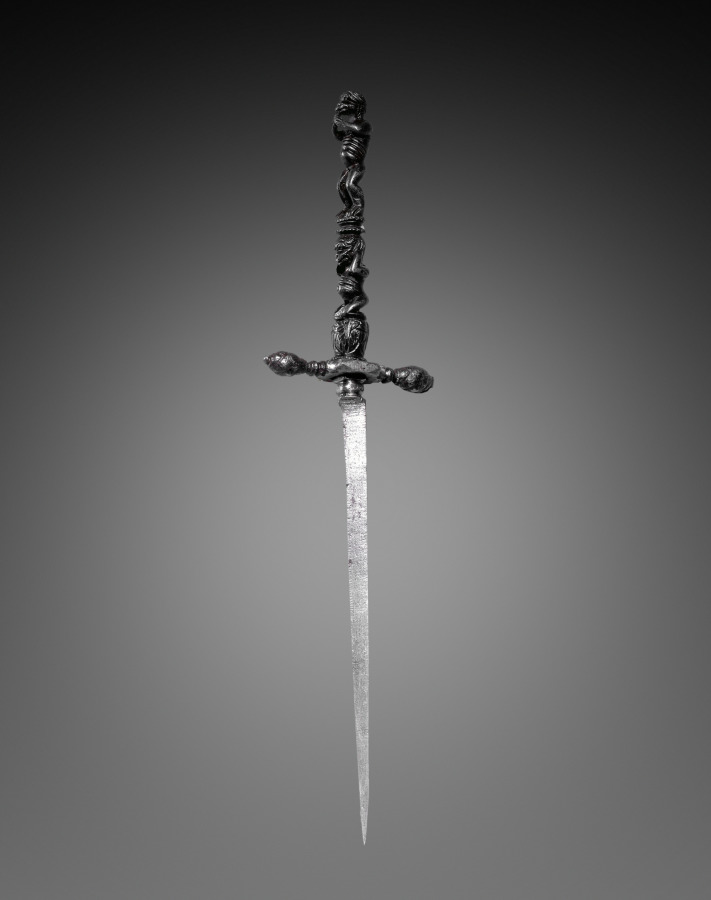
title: Stiletto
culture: Italy, Brescia, 17th century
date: c. 1650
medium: steel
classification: Arms and Armor